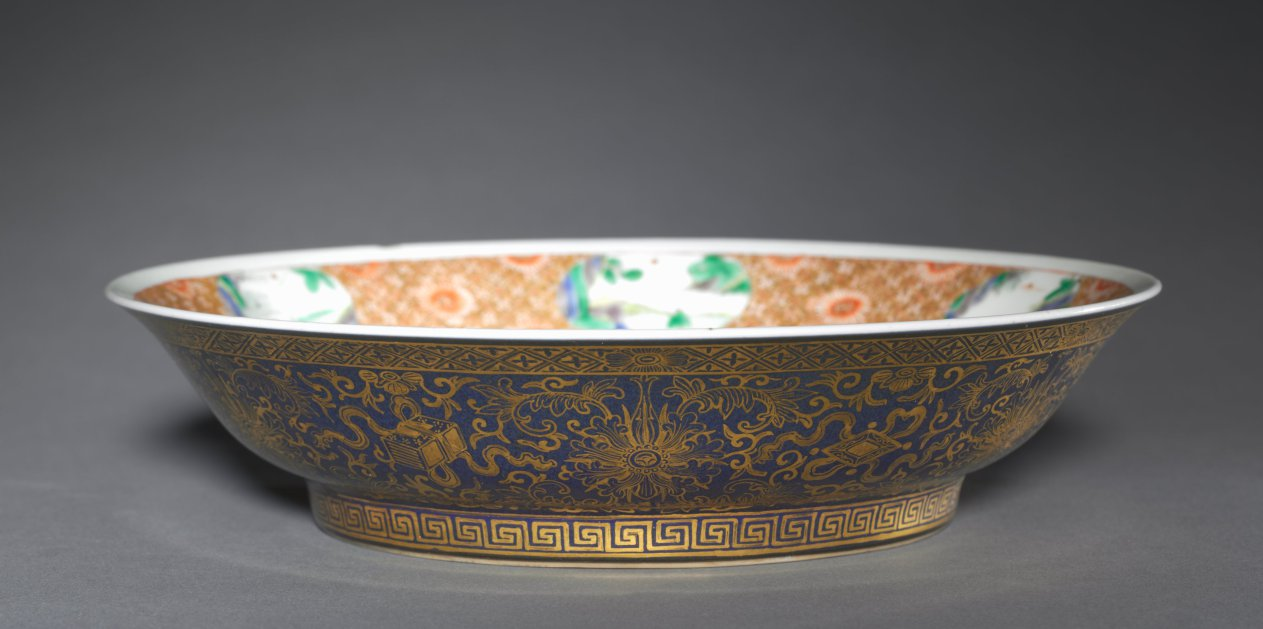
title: Dish with Zhang Guolao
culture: China, Jiangxi province, Jingdezhen kilns, Qing dynasty (1644-1911), Kangxi reign (1662-1722)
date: 1662–1722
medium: porcelain with famille verte overglaze enamel and painted gold decoration (interior) and powder blue glaze with painted decoration (exterior)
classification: Ceramic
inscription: 大清康熙年製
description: Zhang Guolao, featured on this dish, is one of the Eight Immortals and a gifted magician who was believed to know the secret arts to obtain longevity. Typically depicted as an old man and accompanied by his mule, he is the patron saint of artists. His mule is said to be magical; it can be folded up like a piece of paper to fit into a small bag. The central scene is framed by a sumptuously gold-decorated rim showing spaces reserved for landscape scenes in primarily fresh blue and green colors.